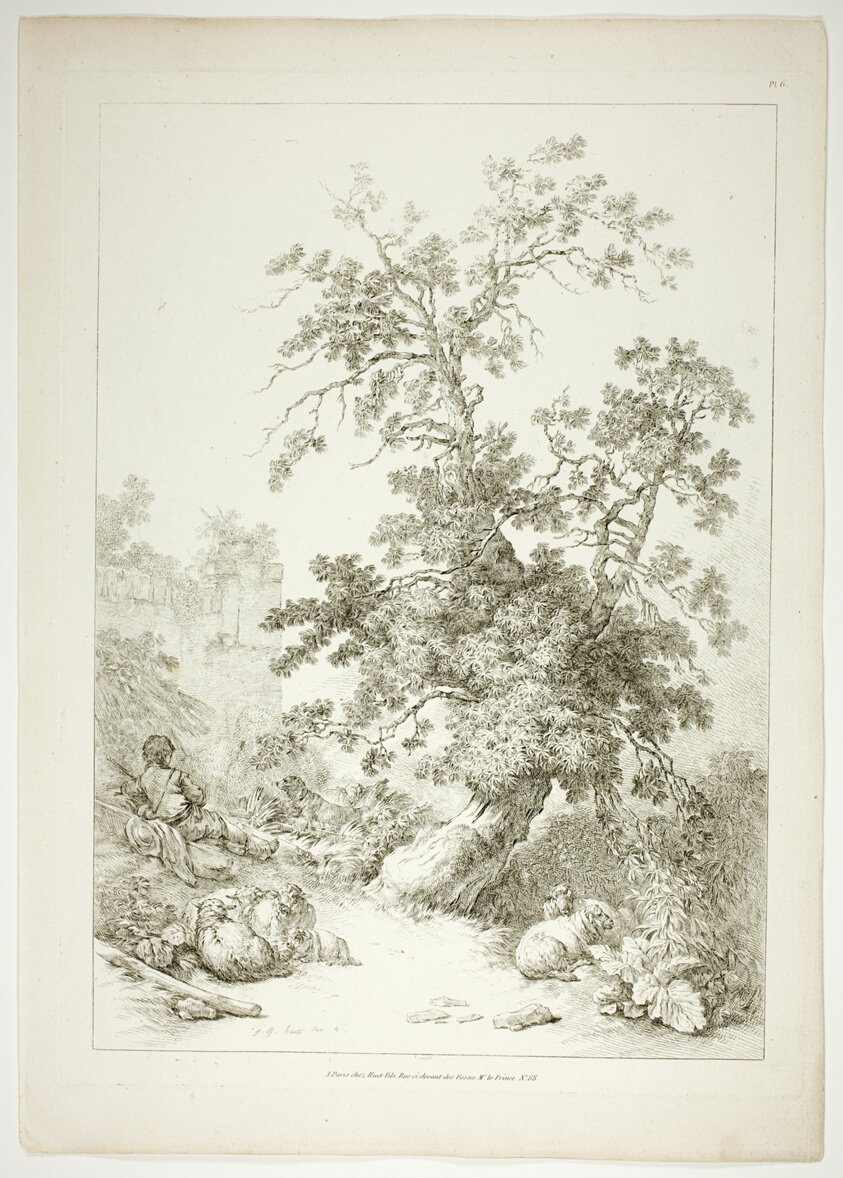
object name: Print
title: Plate Six of 38 from Oeuvres de J. B. Huet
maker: Jean Baptiste Huet (French, 1745-1811)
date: 1796–99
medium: Etching on paper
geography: France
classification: etching; print; prints and drawing